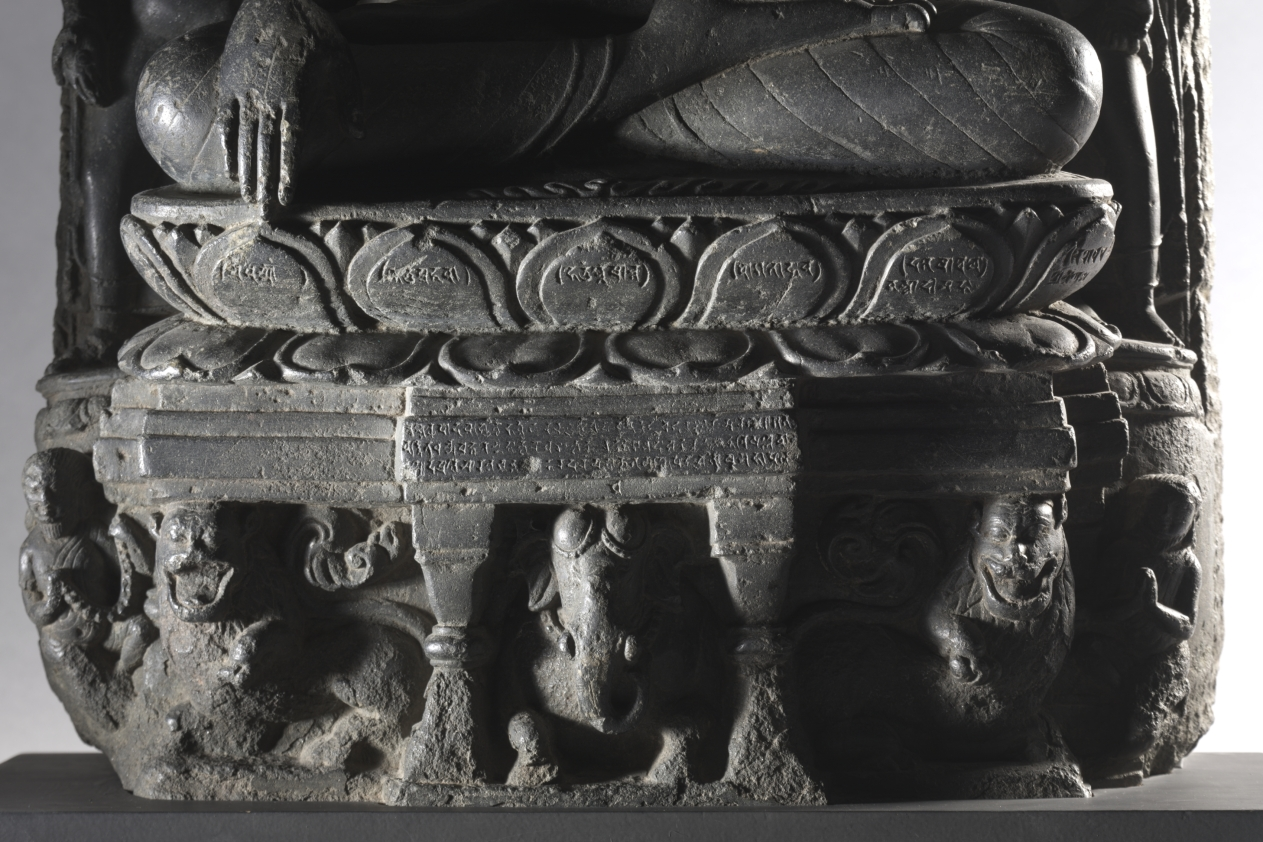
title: Buddha Calling on Earth to Witness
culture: Northeastern India, Bihar, Tetravan, Pala Period (750-1197)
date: 800s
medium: chloritic schist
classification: Sculpture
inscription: Ye dharmā hetu prabhavā tesā hetu tathāgata hya vadat...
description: This sculpture is one of a series that depict the Buddha at different scenes in his life. Here, he is at Bodhgaya, the place where he achieved enlightenment. At the top of the composition are the branches of the ficus tree with its heart-shaped leaves, under which he achieved enlightenment. His hand gesture indicates that he is calling upon the goddess of the earth to witness the moment. During the Pala period of the eighth through 12th centuries in medieval India, Buddhism dominated and flourished in major monastic universities. After the fall of the Pala dynasty, the numerous battles between small kingdoms vying for power caused the destruction of the Buddhist monasteries, and Buddhist monks fled with texts and movable art to Nepal, Tibet, and Southeast Asia, so that by the 14th century, Buddhism was eradicated in India.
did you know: The donors kneel at the lower corners.